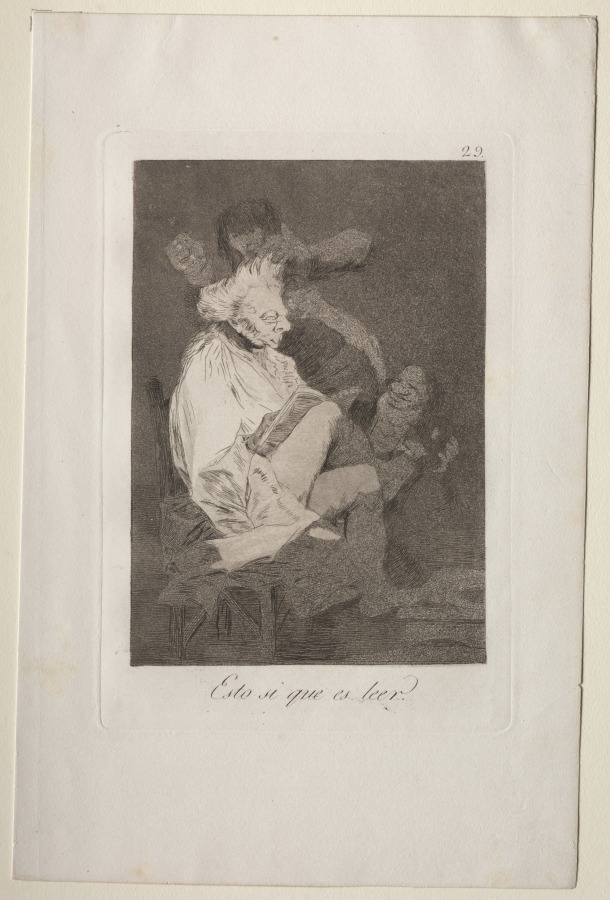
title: That Certainly is Being Able to Read, Plate 29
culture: Spain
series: Los Caprichos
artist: Francisco de Goya (Spanish, 1746–1828)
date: 1799, printed c. 1855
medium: etching and aquatint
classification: Print